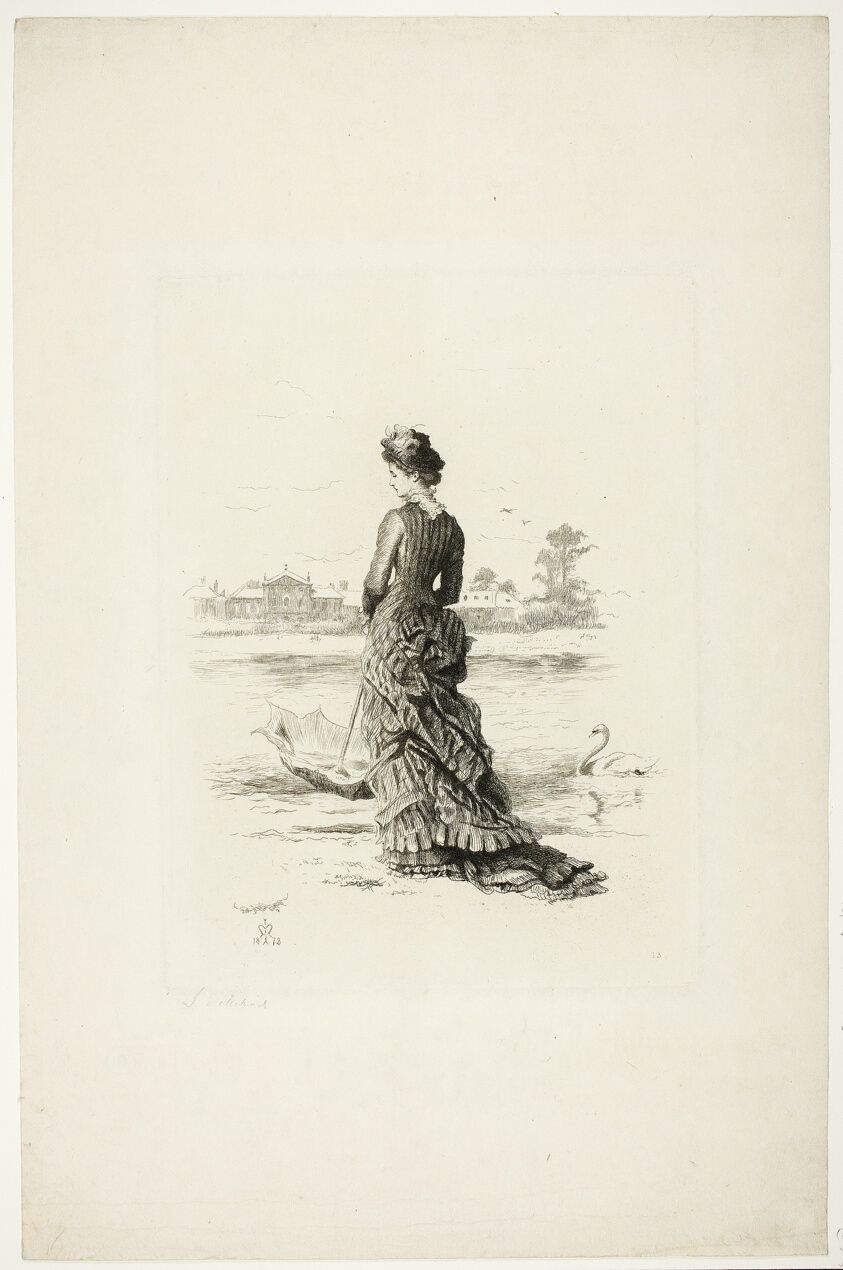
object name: Print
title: A Penny for Her Thoughts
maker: Sir John Everett Millais (English, 1829-1896)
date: 1878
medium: Etching on ivory laid paper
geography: England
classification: etching; print; prints and drawing